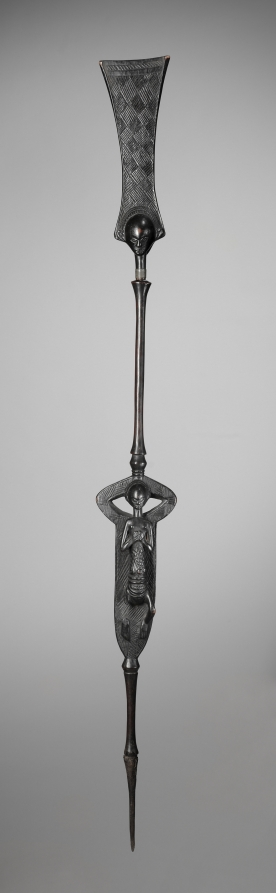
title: Staff of Office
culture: Central Africa, Democratic Republic of the Congo, Luba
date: early to mid-1800s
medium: Wood and iron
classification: Sculpture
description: Sanctified by a ritual specialist and enhanced with medicinal substances, the staff possessed supernatural qualities and was endowed with healing power. Luba staffs are among the most important regalia of Luba kings. The metal point alludes to the kingdom's stability and durability. Each staff has its own distinctive iconography to reflect regional styles. As Chief Msidi (former owner of this staff) ruled over the Yeke kingdom (and not the Luba kingdom), it begs the question of how he acquired this symbol of another realm's power.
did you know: The Yeke kingdom ruler Chief Msidi gave this as a gift of appreciation to the British missionary Frederick Stanley Arnot, whom the chief had invited to his kingdom.